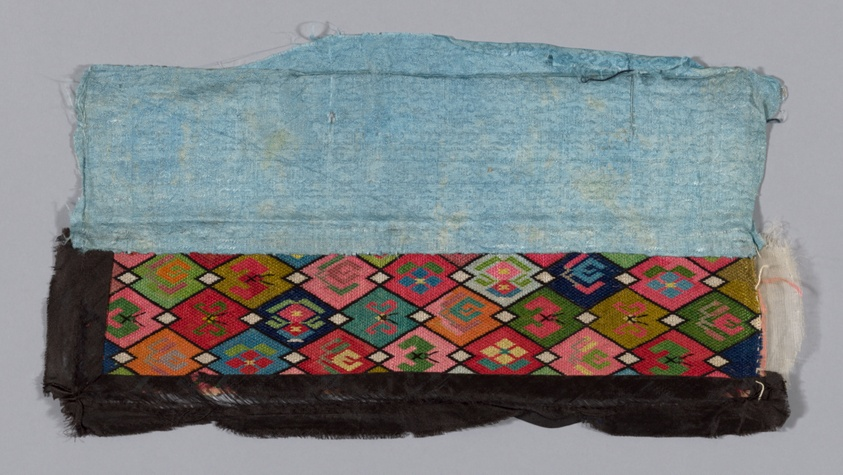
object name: Costume and Accessories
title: Trouser Band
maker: Han-Chinese (China)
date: Qing dynasty (1644–1911), 1875/1900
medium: Forty-four pairs and eight odd pieces of embroidered sleeve, ankle bands, etc. on gauze.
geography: China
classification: costume - embroidery; embroidery; costume